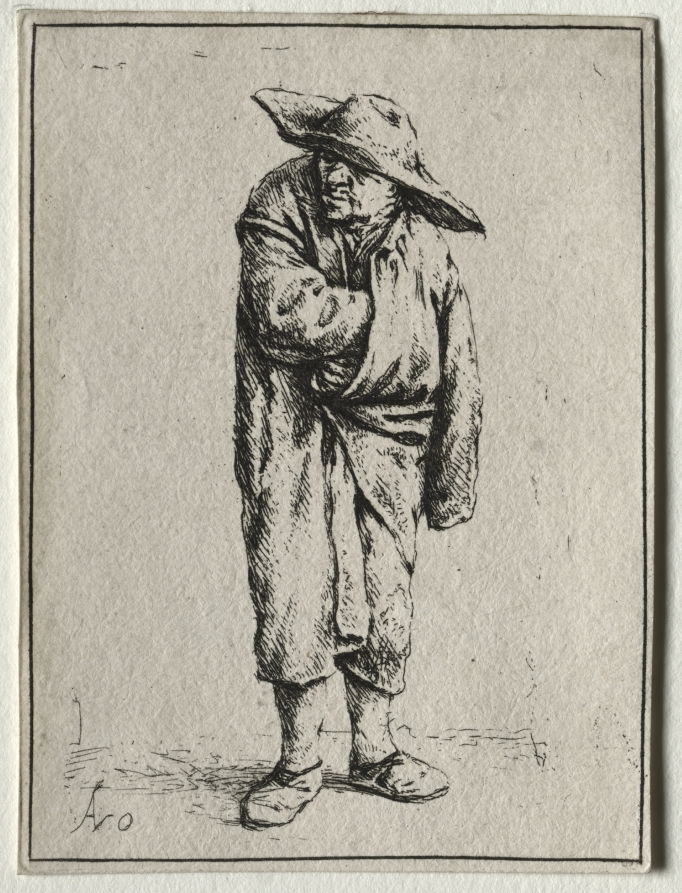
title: Peasant with his hand in his cloak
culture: Netherlands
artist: Adriaen van Ostade (Dutch, 1610–1684)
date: before 1647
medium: etching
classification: Print